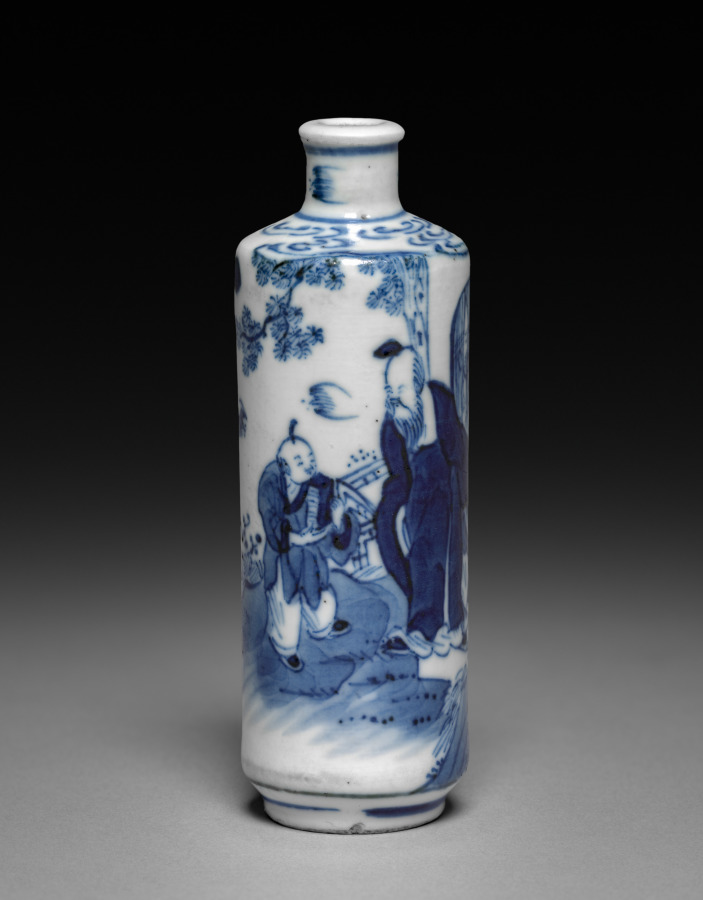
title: Blue and White Snuff Bottle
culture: China, Qing dynasty (1644-1911), Kangxi reign (1661-1722)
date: 1661–1722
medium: porcelain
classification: Ceramic